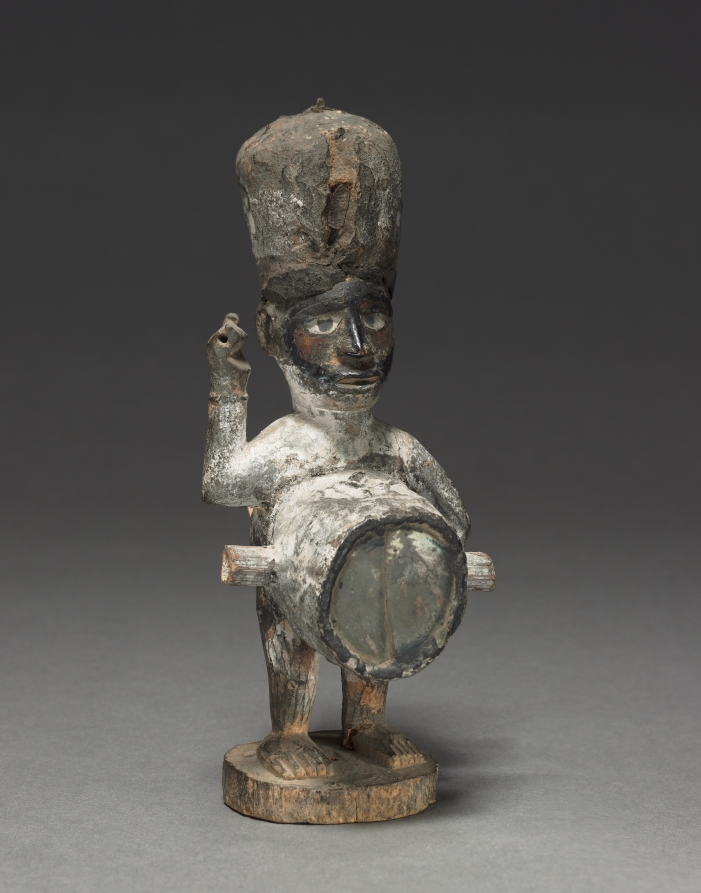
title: Power figure (nkisi)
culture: Central Africa, Republic of the Congo, Kongo people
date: late 1800s-early 1900s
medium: Wood, organic materials (including resin), probably kaolin, and metalized glass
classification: Sculpture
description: This figure is of the nduda type, characterized by the attached "guns" loaded with gunpowder and used to shoot witches. It is the only figure that adopts the threatening pose: the right hand raised, holding a spear or knife, and the left hand resting on the hip. Two guns protrude horizontally on both sides of the cylindrical medicine pack on the belly, covered with a round piece of mirror.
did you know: This is the only figure in a group of seven found in a French antique shop adopting a threatening pose.